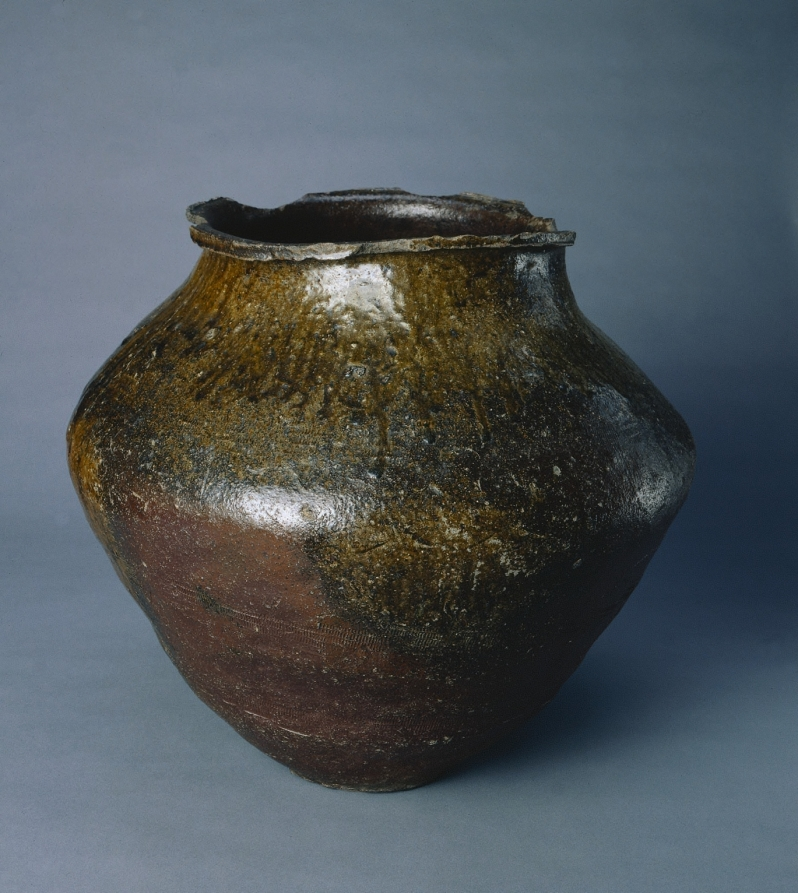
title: Storage Jar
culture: Japan, Nanbokuchō period (1336–92)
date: 1350–99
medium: Stoneware with natural ash glaze and impressed designs (Tokoname ware)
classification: Ceramic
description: This storage jar was made by piling coils of clay atop one another, smoothing the inner and outer surfaces, and allowing the clay to dry before adding another section of the form. The wide rim and mouth were then added using a potter’s wheel. Because of its small base, the vessel could stand safely on a narrow step on the steep slope of a rising kiln floor. Such kilns were built into the side of a hill and used wood for firing. The natural ash glazes took about a week to 10 days to form.